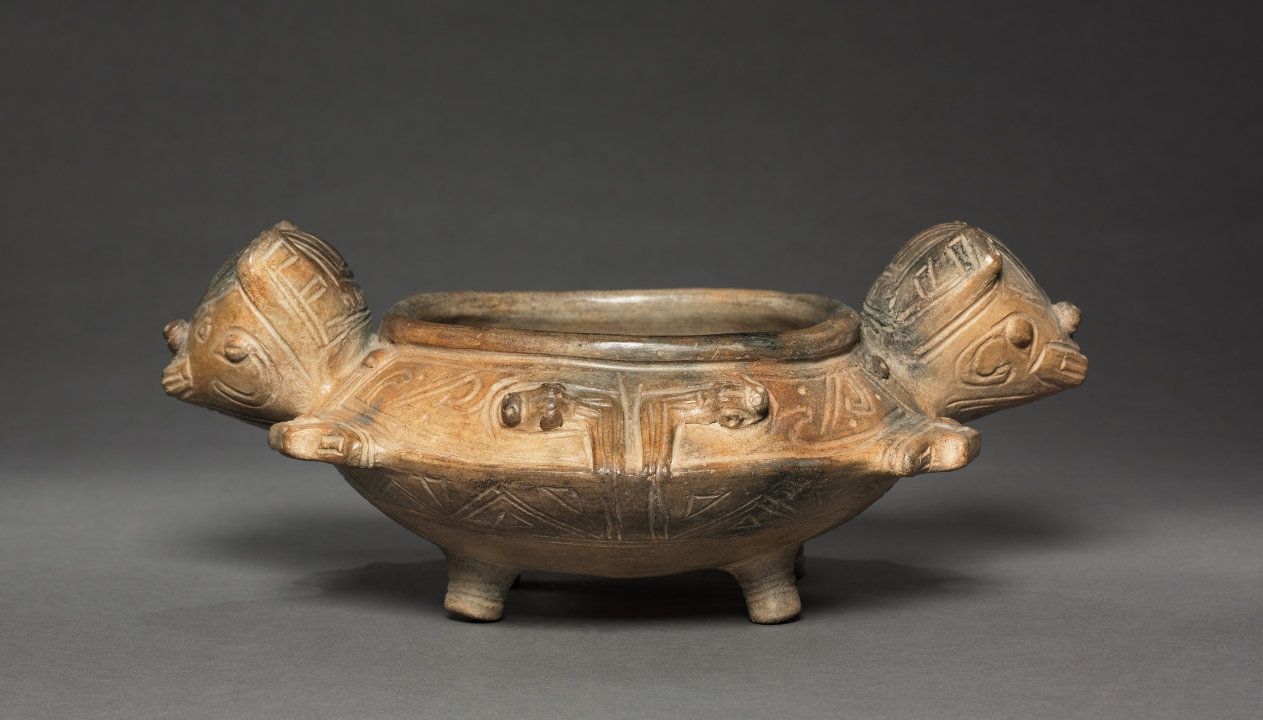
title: Double-Bat Bowl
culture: Colombia, Tairona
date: c. 900–1550 (thermoluminescence date, 810–1310)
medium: earthenware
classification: Ceramic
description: The archaeological Tairona civilization of mountainous northern Colombia is believed to be ancestral to the contemporary Kogi indigenous group. Ancient Tairona sites are terraced, and characterized by circular stone building foundations. The most famous form of Tairona art is gold jewelry, especially lost-wax cast figurines of chiefs, and anthropomorphic bats and birds. Tairona ceramics are less well known. This bowl has two protruding bat heads and four legs. The incurved sides of the bowl to either side of each head represents the bats' wings. The vessel's surface is decorated with raised serpents, as well as incised and impressed patterns.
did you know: The Tairona civilization lived in the mountains of northern Colombia.